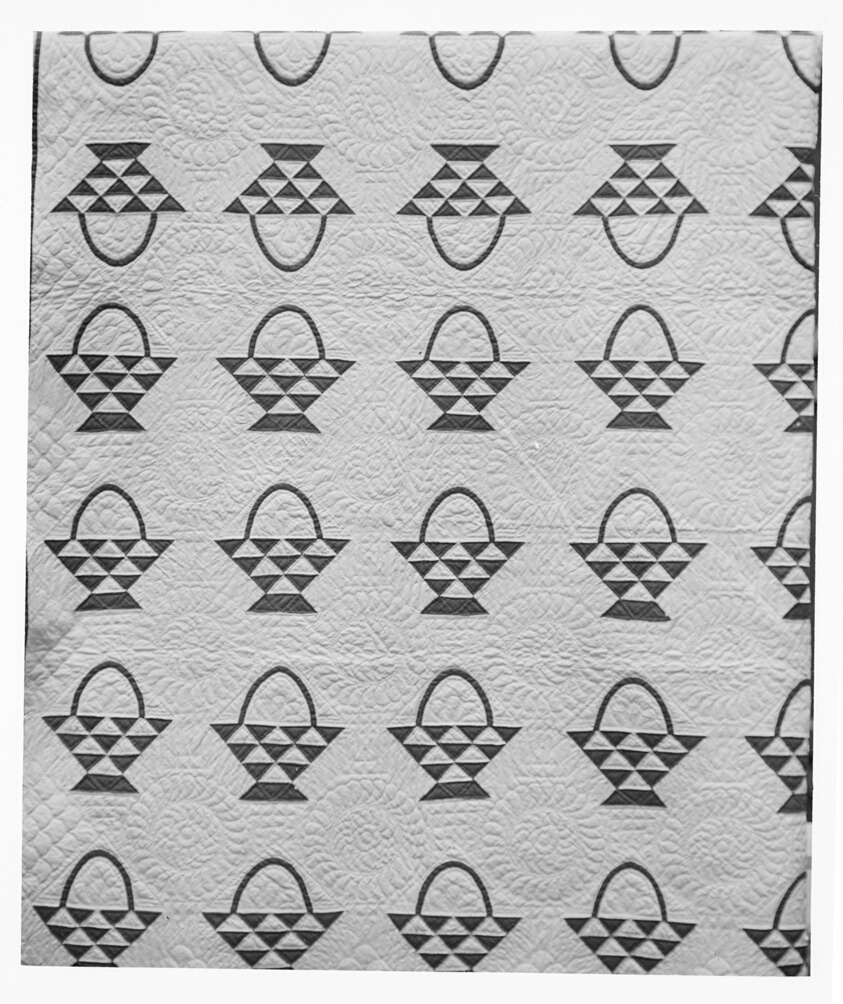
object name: Textile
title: Bedcover (Cherry Basket Quilt)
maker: United States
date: c. 1860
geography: United States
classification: textile; needlework - quilt